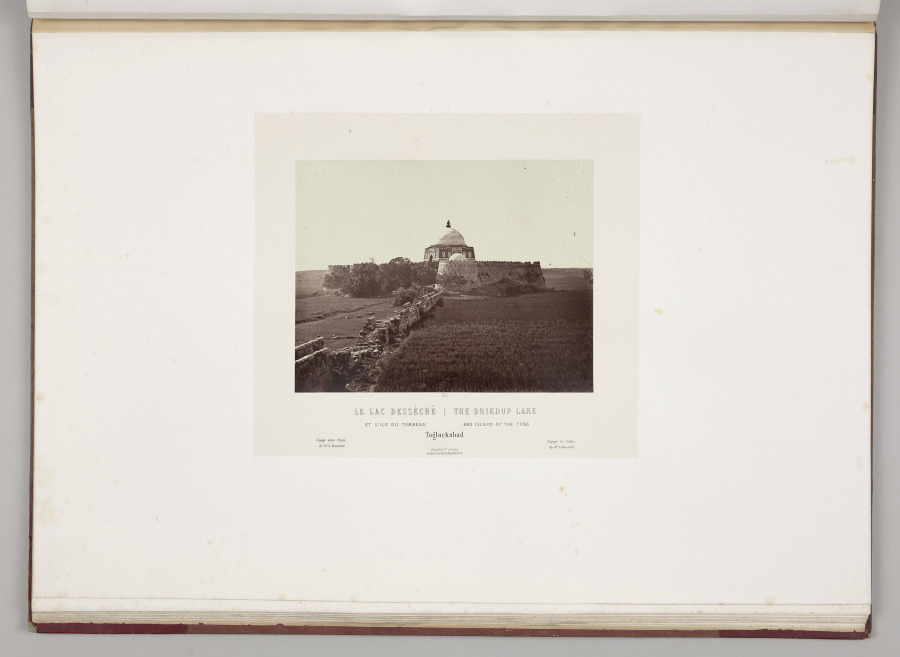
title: The Driedup Lake and Island of the Tomb, Togluckabad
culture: France, 19th century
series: India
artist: Louis-Théophile Marie Rousselet (French, 1845–1929)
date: 1865–68, published 1869–70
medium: Albumen print from glass plate negative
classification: Photograph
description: Concerned that his drawings did not do justice to the splendor of India’s monuments, Rousselet learned photography in India that year, a remarkable accomplishment. He proved to be a talented photographer with a sophisticated sense of composition. The scenes in this volume sweep across sites of Sultanate, Rajput, and Mughal power in northern India, from the sacred Hindu city of Varanasi on the Ganges River to Alwar in Rajasthan. Also included are several scenes of industry and portraits of Indian rulers.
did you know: Louis Rousselet described himself as a “scientific traveler” when he went to India alone at age 18 in 1863 and stayed into 1868.